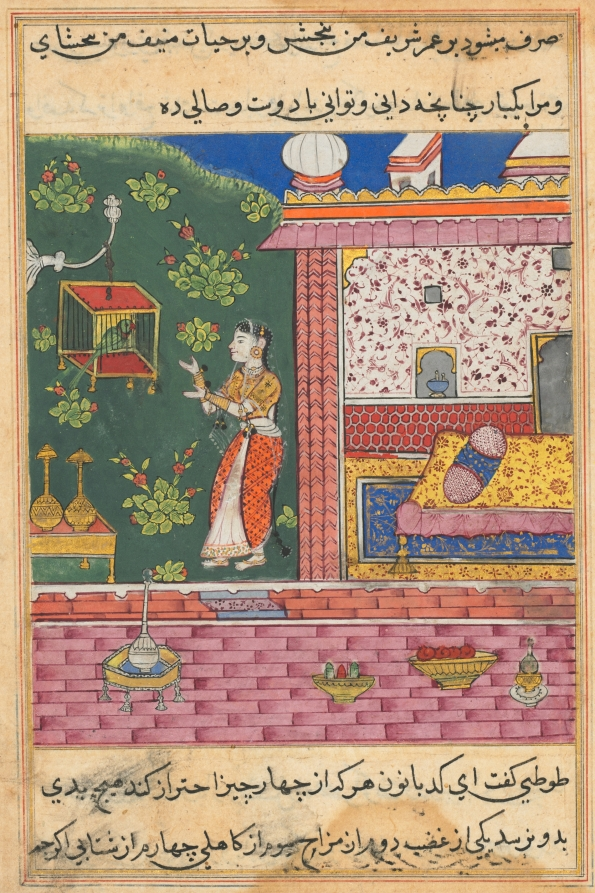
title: The Parrot Addresses Khujasta at the Beginning of the Thirtieth Night, from a Tuti-nama (Tales of a Parrot)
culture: Mughal India, court of Akbar (reigned 1556–1605)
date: c. 1560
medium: gum tempera, ink, and gold on paper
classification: Painting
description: At the beginning of fifty-two consecutive nights, Khujasta prepares to depart her home to meet her lover. Before she leaves, she consults with Tuti, her husband’s wise talking parrot. On this occasion, he tells her the story of a woman, her children, and their dangerous encounter with a leopard.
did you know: The parrot was overpainted and repositioned—his original tail is still visible!